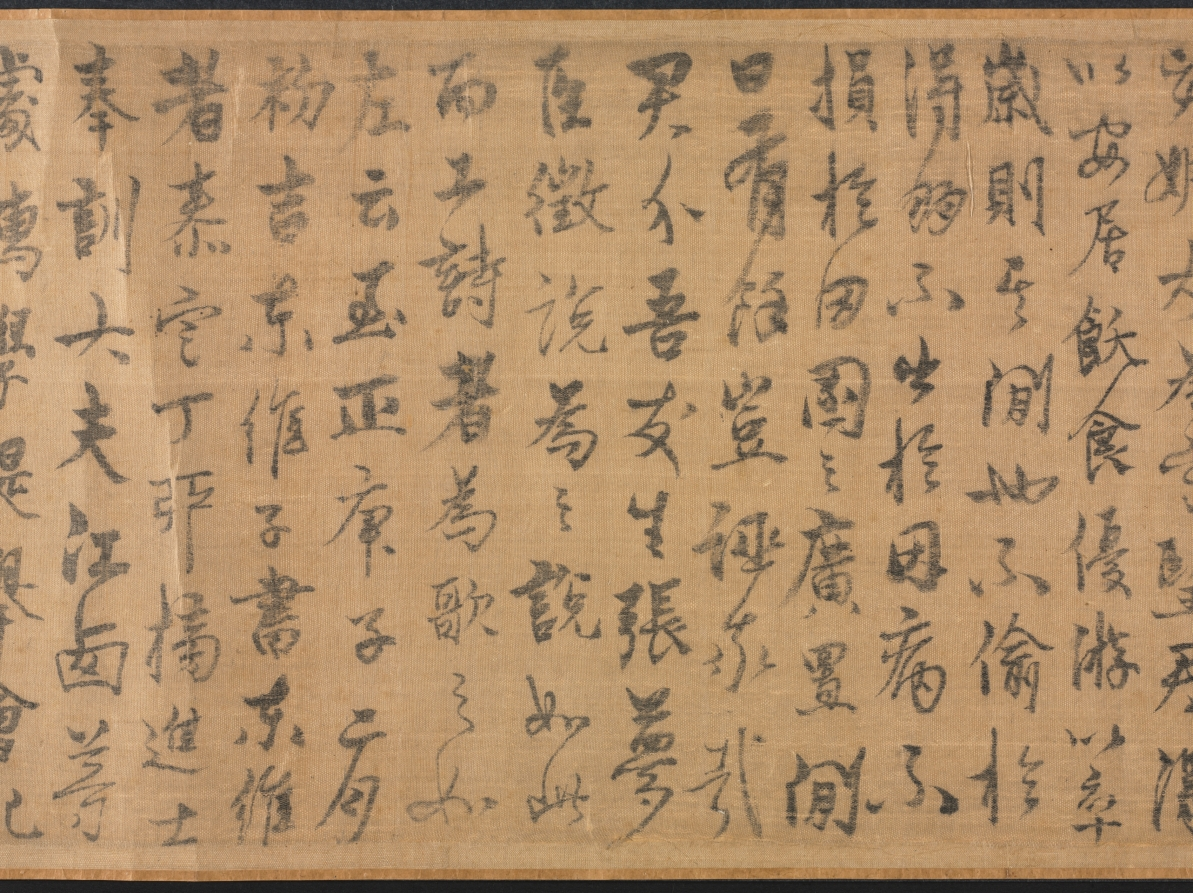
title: Leisure Enough to Spare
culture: China, Yuan dynasty (1271-1368)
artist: Yao Tingmei (Chinese, active mid-1300s)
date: 1360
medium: handscroll, ink on paper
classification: Painting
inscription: 至正廿年春正月_日作此併系鄙語于尾 地偏人遠閉柴關，滿院松陰白晝閒。 眼底風塵渾忘却，坐看流水臥看山。 吳興姚廷美畫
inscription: 23 colophons and 53 seals (dates unavailable for some): 1 colophon, dated 1360, and 2 seals of Yang Weizhen (1296-1370); 1 colophon and 3 seals of Wan Yi; 1 colophon of Zhang Junde; 1 colophon and 3 seals of Angji (act. ca. mid-14th c.); 1 colophon and 1 seal of Xu Shiquan; 1 colophon and 3 seals of Gao Yu; 1 colophon and 2 seals of Li Mingfu; 1 colophon and 2 seals of Lu Lin; 1 colophon and 1 seal of Zhang Qian; 1 colophon of Tao Tangwen; 1 colophon and 1 seal of Wu Yuangui (act. ca. 1300-60); 1 colophon of Bao Jiong; 1 colophon of Wang Zao; 1 colophon and 1 seal of Ma Chuyi; 1 colophon and 1 seal of Lin Yizhuang; 1 colophon and 1 seal of Gu Shunju; 1 colophon and 2 seals of Wang Jing; 1 colophon and 2 seals of Lin Shouchang; 1 colophon and 1 seal of Gao Zhidao; 1 colophon of Lin Xun; 1 colophon, dated 1359, and 2 seals of Meng Weicheng (act. mid-14th c.); 1 colophon and 1 seal of Meng Zhiji (act. mid-l4th c.); 14 seals of Liang Qingbiao 梁清標 (1620-1691); 1 poem dated 1755 and 5 seals of the Qianlong 乾隆 emperor (r. 1736-95); 2 seals of the Jiaqing 嘉慶 emperor (r. 1796-1821); 3 seals of the Xuantong 宣統 emperor (r. 1909-11).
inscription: Title on frontispiece by Zhang Bi 章弼: Signed Gongchen 拱辰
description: Seclusion and leisure—the ideals of the literati, or scholar-gentlemen—are expressed in this mature work by Yao Tingmei. The theme acquired special meaning at a time of the military uprisings near the end of the Yuan dynasty. Dedicated to an ascetic named Du, this work combines painting, calligraphy, and poetry; following the painting are more than 20 poems and essays written by notable scholars, one of whom was the calligrapher Yang Weizhen. It reveals not only the aesthetic taste of the literati but also the practice of contributing artistic and literary works to fulfill social obligations. Yao's painting demonstrates his individual style derived from various ancient masters (Guo Xi, Dong Yuan, and Juran). Yang Weizhen's calligraphy exhibits his bold, vigorous style and his intent to capture the spirit of antiquity in art.